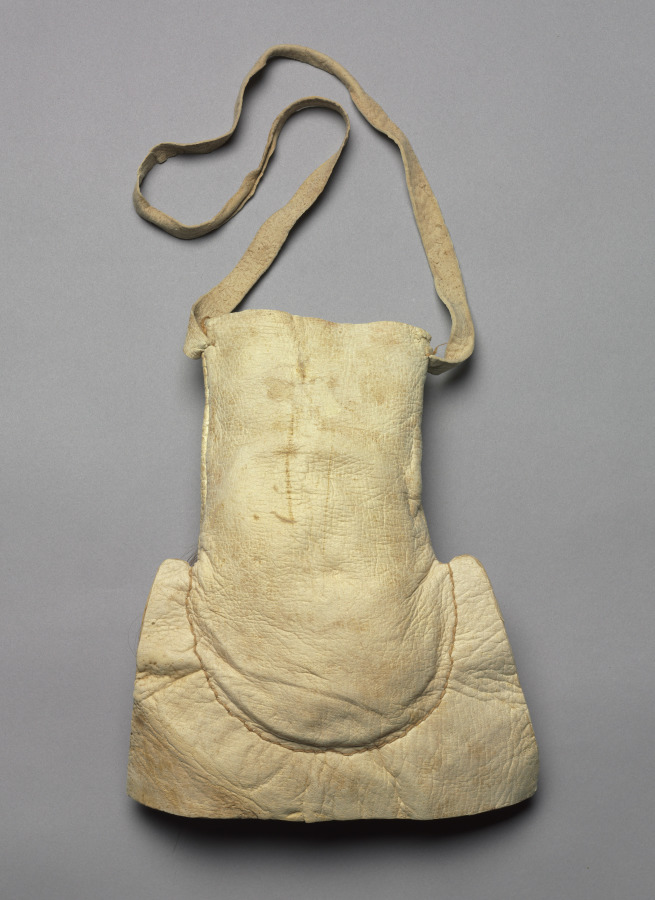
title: Bag with Human Face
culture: Andes, Wari, Middle Horizon, 6th-10th century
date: 600–1000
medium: alpaca or llama hide, human hair, pigment, cotton; coca leaf contents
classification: Mixed Media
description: The face on this bag is decorated with geometric designs that also appear on Wari warrior representations; the circles on the panel beneath the face may refer to an elite tunic made of tie-dyed cloth. The bag was used to carry coca leaves, which in the past and today have important practical and religious purposes in the Andes. Chewing the leaves during physical exertion improves stamina; when used ritually, the leaves initiate communion with cosmic forces.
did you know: This bag was used to carry coca leaves.